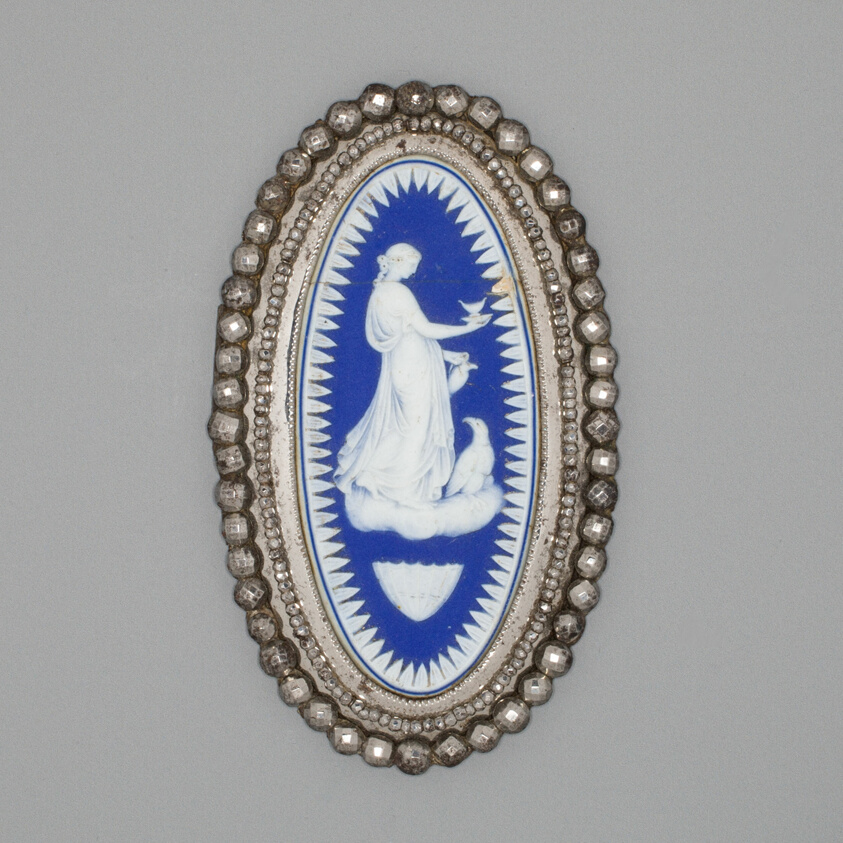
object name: Ceramics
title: Buckle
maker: Wedgwood Manufactory (England, founded 1759)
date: Late 18th century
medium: Stoneware (jasperware) and cut steel frame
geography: Burslem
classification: buckle (strap accessory); accessories (object genre); costume accessory; stoneware; european decorative arts; ceramics